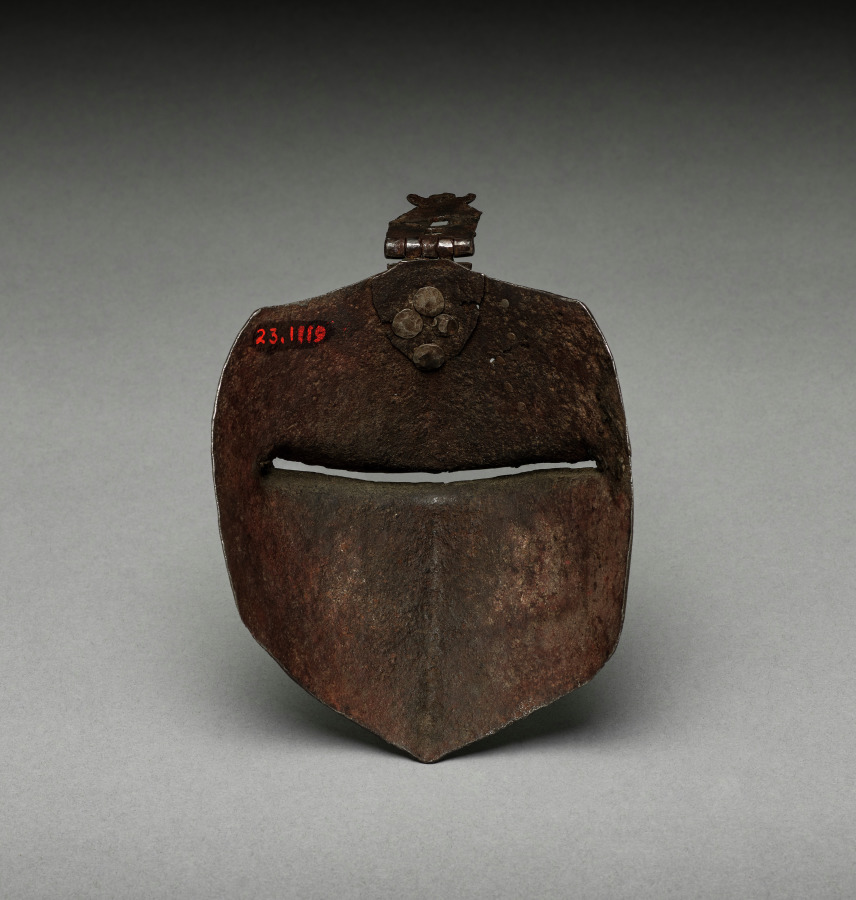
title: Visor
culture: Italy, early 15th Century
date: c. 1400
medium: steel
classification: Arms and Armor